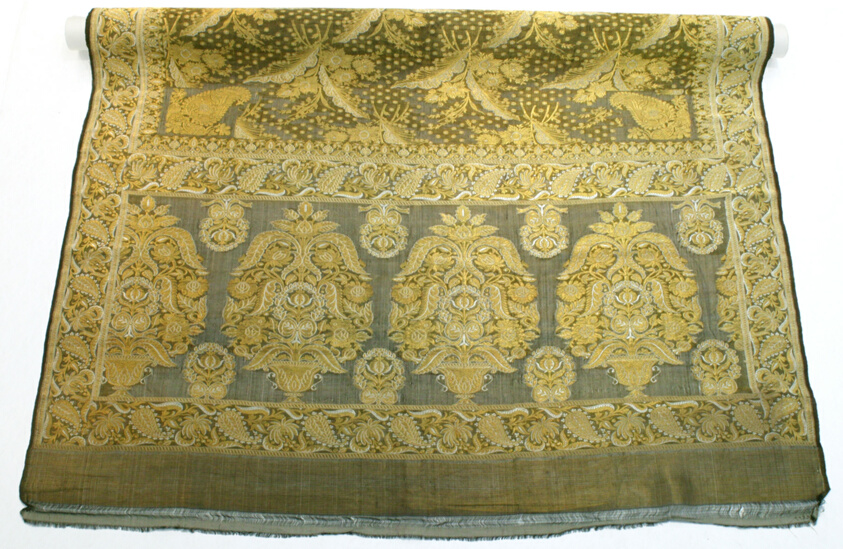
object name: Costume and Accessories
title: Sari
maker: India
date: 19th century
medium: Grey with leaf cluster design in gold and silver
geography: India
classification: textile; weaving; costume; dress (garment); clothing; sari (garment)